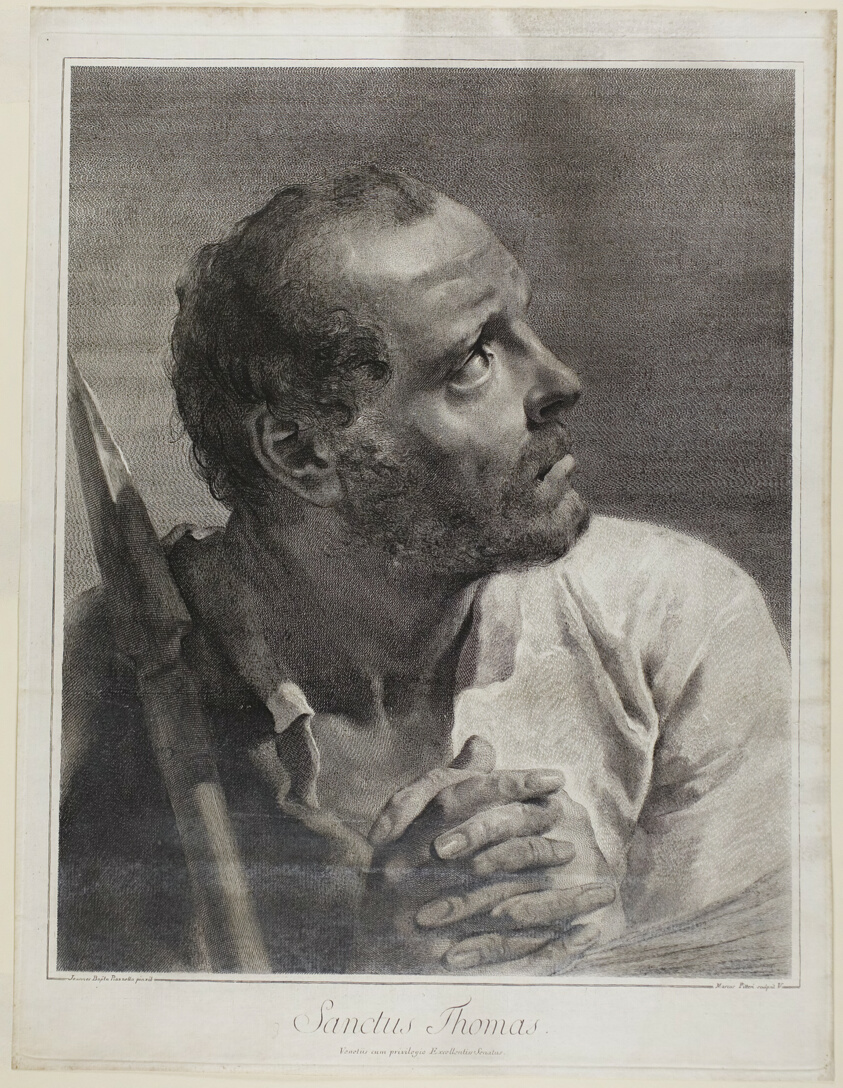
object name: Print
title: Saint Thomas, from The Holy Family and the Twelve Apostles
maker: Giovanni Marco Pitteri (Italian, 1702-1786); after Giovanni Battista Piazzetta (Italian, 1682-1754)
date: 1742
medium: Engraving in black on paper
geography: Italy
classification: engraving; print; prints and drawing